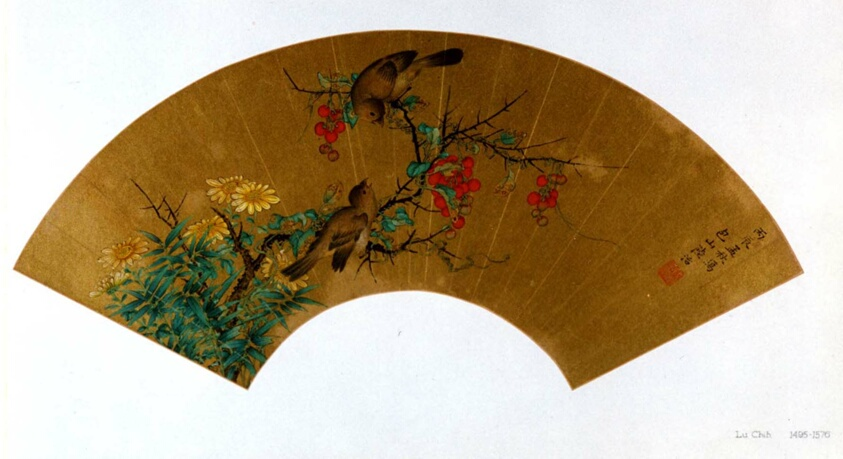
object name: Painting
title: Birds, Berries, and Flowers 花鳥折扇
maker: Artist unknown; Spurious signature of Lu Zhi (Chinese, 1496–1576)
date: Ming dynasty (1368-1644) or Qing dynasty (1644-1911)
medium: Folding fan mounted as an album leaf; ink and color on gold paper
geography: China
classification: album leaf; painting; asian art